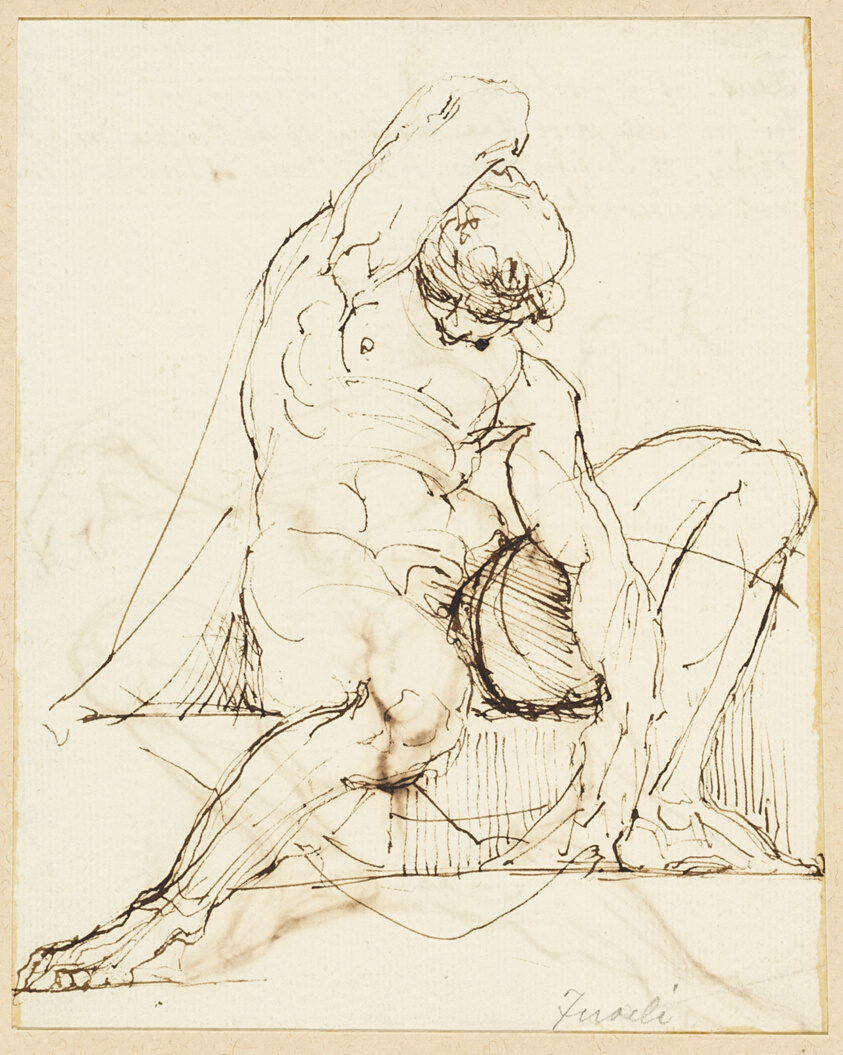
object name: Drawing and Watercolor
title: Study of Ignudo in Sistine Chapel, Rome (recto); Paraphrase of the Ignudo Seated to Upper Right of Prophet Jeremiah in Chapel, Rome (verso)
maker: Henry Fuseli (Swiss, active in England, 1741-1825); after Michelangelo Buonarroti (Italian, 1475-1564)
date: c. 1800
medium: Pen and brown ink (recto and verso) on ivory laid paper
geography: England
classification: pen and ink drawings; drawings (visual works); prints and drawing; paper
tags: zigzags